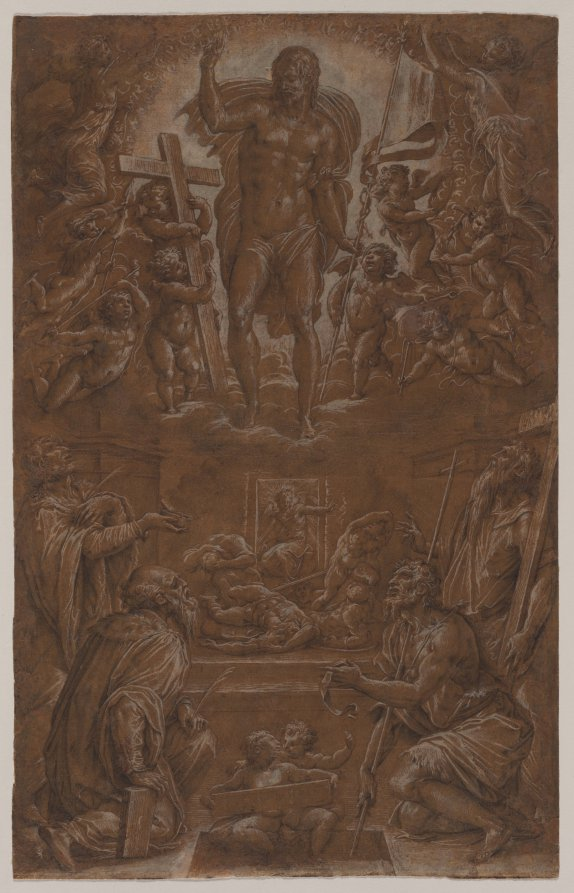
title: The Risen Christ Adored by Saints and Angels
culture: Italy, 16th century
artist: Giorgio Vasari (Italian, 1511–1574)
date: 1566–68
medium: Black chalk, pen and brown ink, and extensive white heightening (wash and point of brush), with incising on paper prepared with a brown wash.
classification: Drawing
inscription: by artist, lower center, in black chalk: [victime] pas[chali]; verso of secondary support, upper right, in brown ink: [illegible] 274; center left, in brown ink: [5?] [illegible]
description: Florentine artist and author Giorgio Vasari venerated Michelangelo as the premier example of artistic genius and emulated the master in much of his work. He made this modello (a finished drawing for presentation to a patron) in preparation for a church altarpiece in Florence. It shows a finely muscled Christ appearing within a host of angels above a group of saints. Vasari’s Christ imitates the pose and body type of Michelangelo’s Christ in the Last Judgment fresco; he altered the pose, while suggesting his knowledge of the earlier composition.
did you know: This highly finished presentation drawing, called a modello, was made by the artist to show to his patron the final plans for a painted altarpiece.